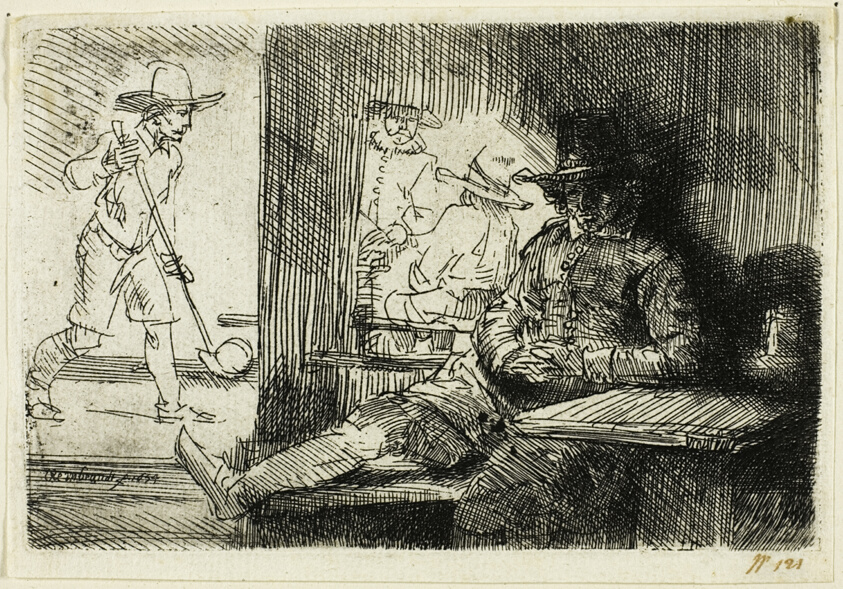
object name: Print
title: The Ringball Player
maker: Rembrandt van Rijn (Dutch, 1606-1669)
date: 1654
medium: Etching on ivory laid paper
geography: Holland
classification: etching; print; prints and drawing; paper